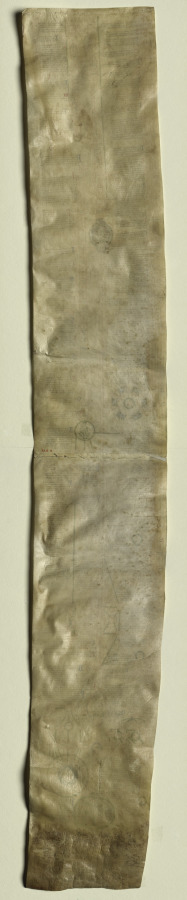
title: Peter of Poitiers's "Compendium Historiae in Genealogia Christi"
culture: England, Canterbury, 13th century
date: c. 1220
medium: ink and tempera on a vellum roll of four membranes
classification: Manuscript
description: This manuscript roll, composed of four membranes formerly stitched together in a continuous roll about nine feet long, has been divided in the middle for easier visibility and study. The text is an abridgment of biblical history focused on the descent of Christ from Adam. It was written by Peter of Poitiers (about 1130–1205), who taught theology and history in Paris and was widely copied. The present roll is an English copy of Peter's text made shortly after his death. Although manuscript rolls were hung on the walls of a classroom as instructional aids to students, some of them have value beyond their textual and historical interest because of the fine quality of their drawings, as seen here. A comparison with Canterbury manuscripts and stained glass of around 1220 is the basis for the attribution to Canterbury. Peter of Poitiers's aim in this project was to assist students prevented from mastering biblical history because of its length and because they were too poor to own books. His text on roll is the briefest possible summary of biblical history. It is arranged in six historical stages, denoting the six ages of the world, as decreed by theological tradition. The first five ages were inaugurated by Old Testament individuals: Adam, Noah, Abraham, David, and Sedecias. The birth of Christ heralded the sixth stage. Beginning at the top of the first membrane, the text consists of brief biographical entries on the ancestors of Christ (Adam, Noah, Abraham, Moses, and David) and other biblical personalities. These extend to the birth of Christ on the fourth membrane, ending with accounts of Hebrew and Roman kings and the Apostles. Each compendium shows the names of the ancestors inscribed within circles, those of direct descent placed vertically in a central column, others scattered in clusters to the right and left. The decoration of the roll consists of a series of medallions of diverse geometrical frames filled with either a figural drawing or a diagram. The style of these pen-and-ink drawings, some illuminated in tempera or tinted with wash, stems from English manuscript and glass painting attributed to the school of Canterbury Cathedral. The style of the museum's illustrations is so close to the stained glass panels made for Trinity Chapel at Canterbury (about 1220) to suggest that an artist active as a glazier in the Cathedral workshop may also have executed the manuscript. In the least, the painter of the roll manuscript was familiar with the style of the painted glass, and on this basis, a date of about 1220 seems appropriate. Additional evidence is supplied by a psalter illuminated at Canterbury shortly before 1220. The figurative scenes in this psalter were apparently illustrated by the same hand that executed the line and wash drawings in the museum's roll.